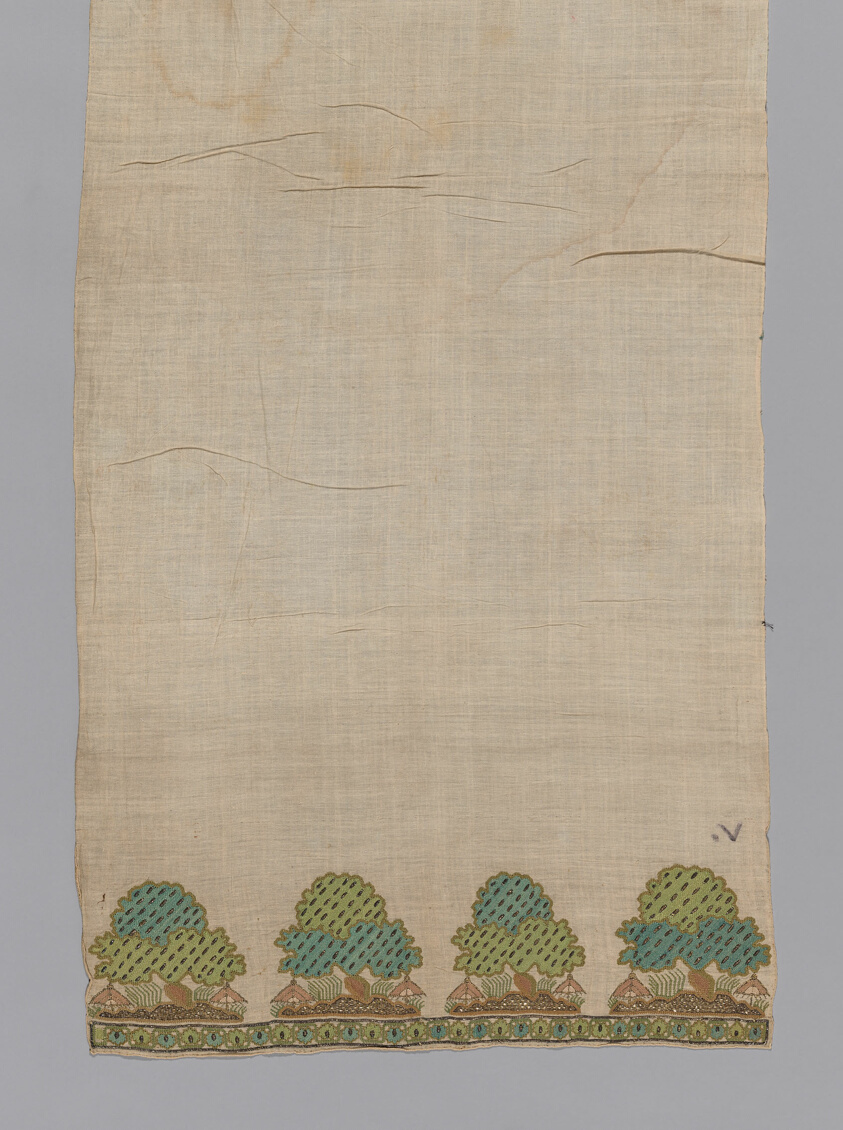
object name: Textile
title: Towel or Napkin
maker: Turkey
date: 19th century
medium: Embroidered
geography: Turkey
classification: textile; weaving; needlework (visual works)